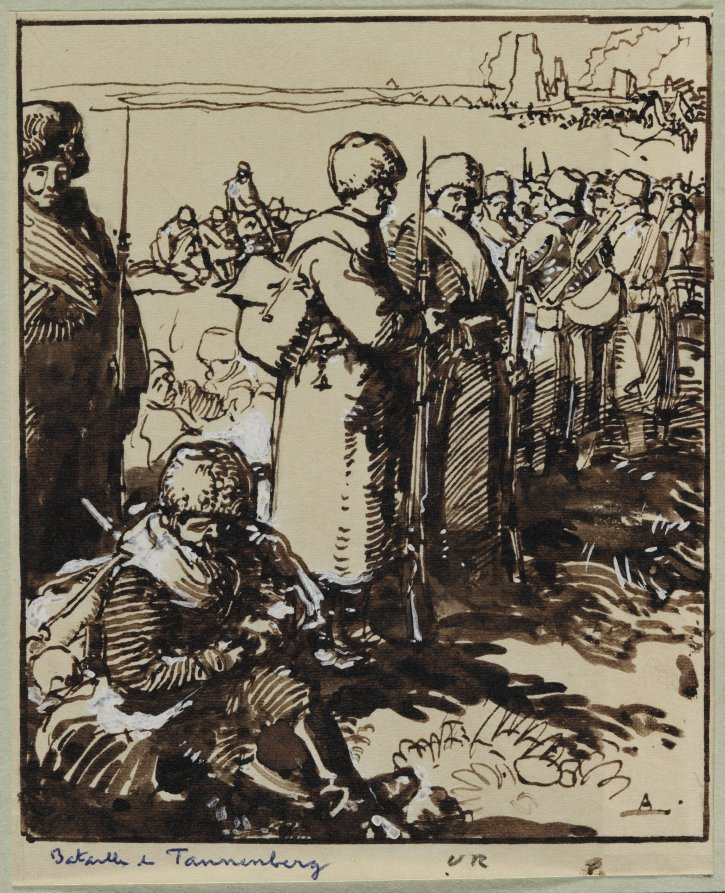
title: Bataille de Tannenberg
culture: France, 20th century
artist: Auguste Louis Lepère (French, 1849–1918)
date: 1914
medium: brush and brown ink heightened with white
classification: Drawing